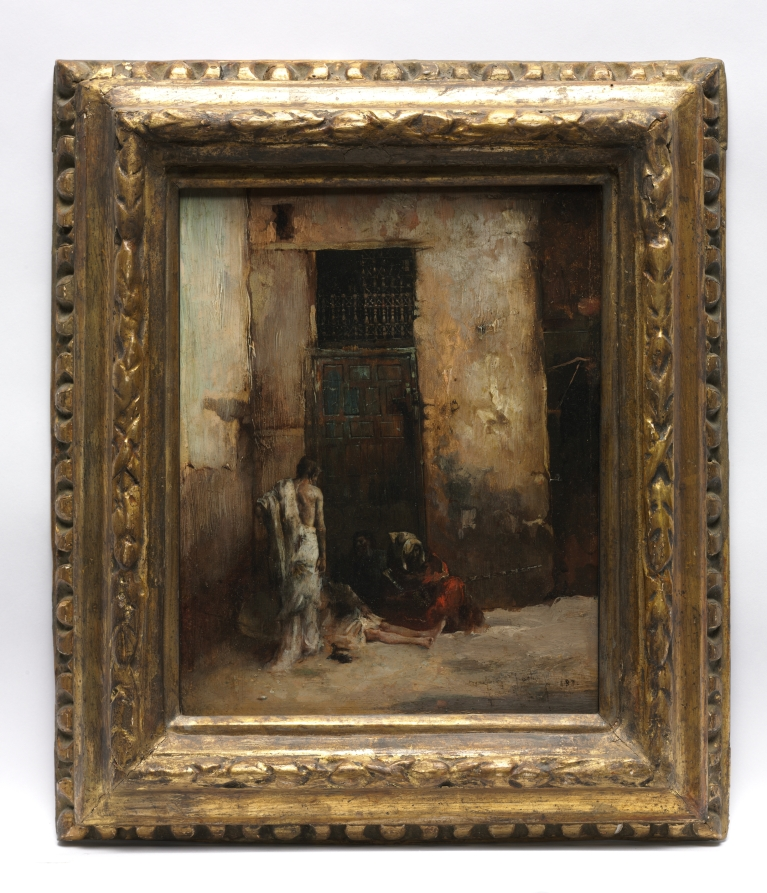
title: Beggars by a Door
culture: Spain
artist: Mariano Fortuny (Spanish, 1838–1874)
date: 1870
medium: oil on panel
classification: Painting